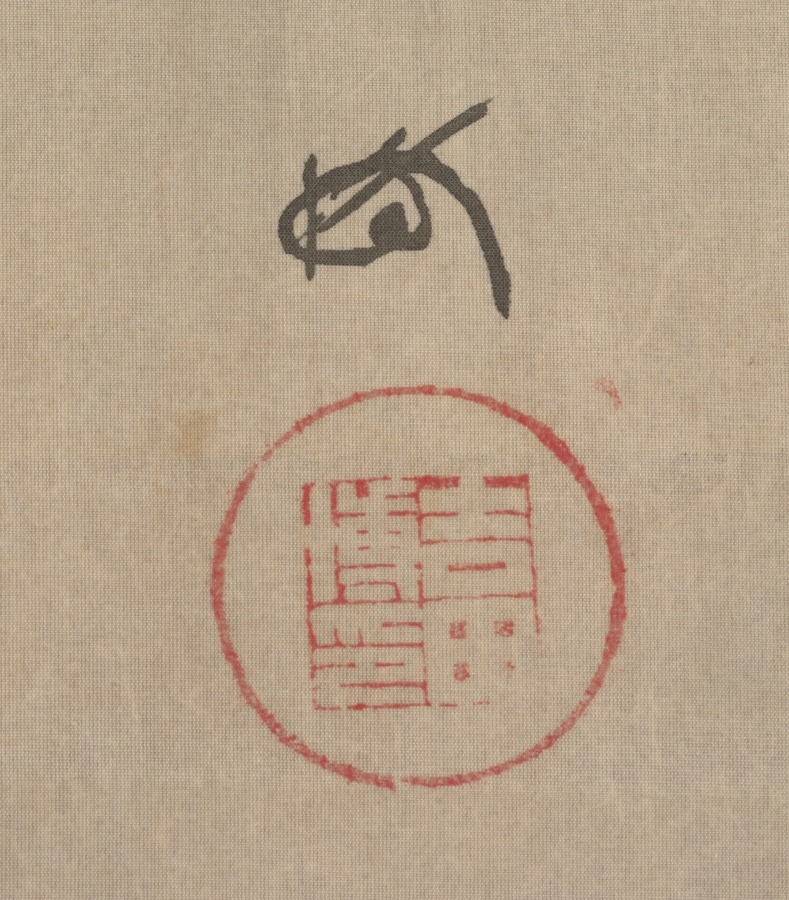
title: Waterfall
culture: Japan, Taishō period (1912–26)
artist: Yoshida Hiroshi (Japanese, 1876–1950)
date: 1924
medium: unmounted hanging scroll; ink and color on silk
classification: Painting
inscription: signed and stamped in lower right corner.